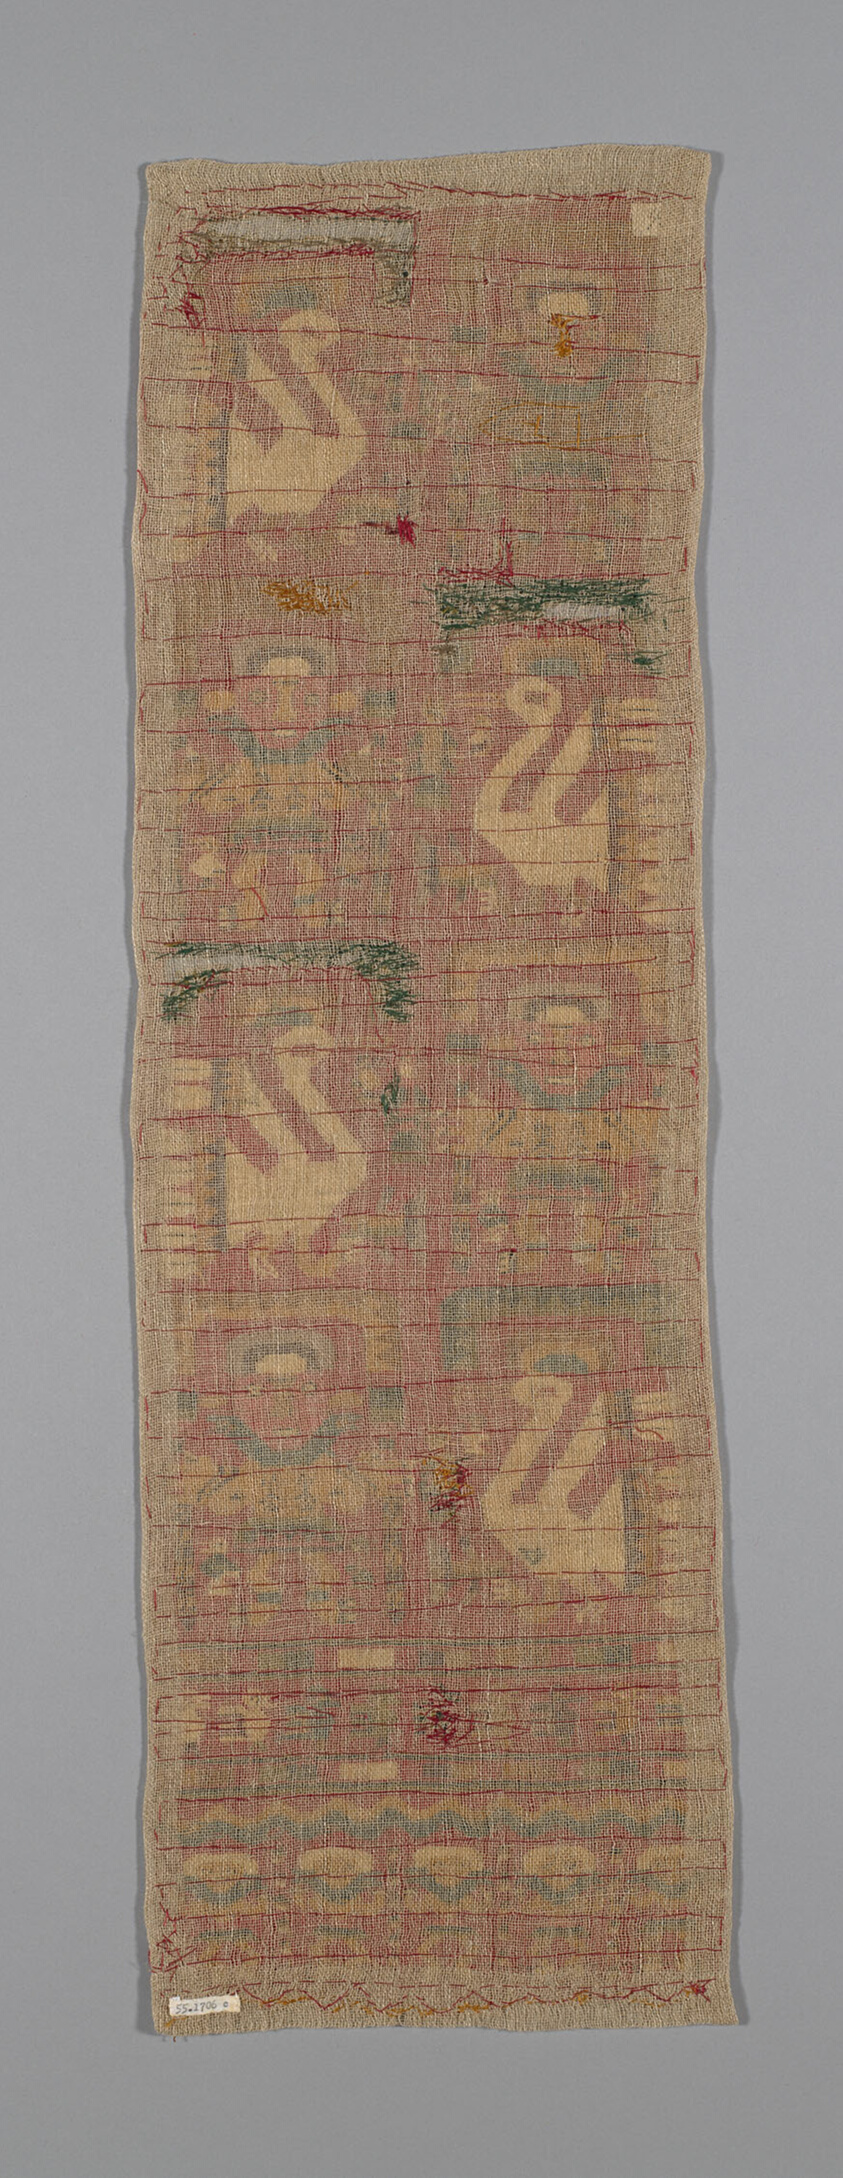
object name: Textile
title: Panel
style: lambayeque, Pre-Columbian, middle horizon, americas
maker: Lambayeque (North coast, Peru)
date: 1000/1476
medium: Cotton and wool (camelid), slit tapestry weave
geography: Peru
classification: weaving; textile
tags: birds, animals, staffs, fish, anthropomorphic figure, geometric motif, headdresses, human, super/natural